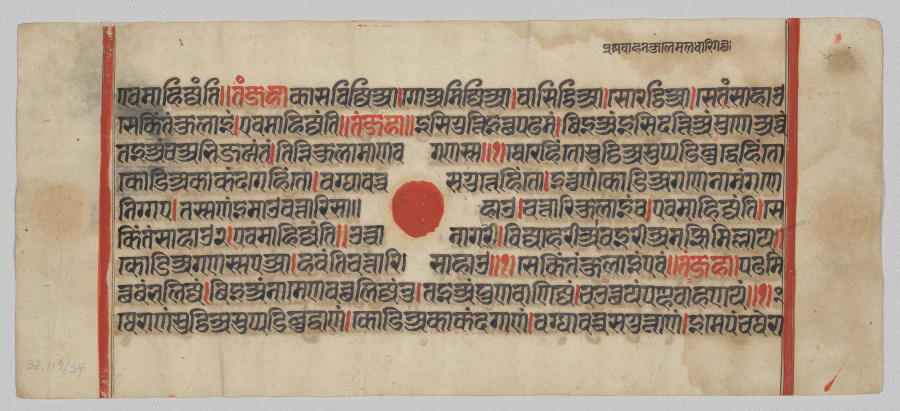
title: Text, Folio 63 (recto), from a Kalpa-sutra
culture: Western India, Gujarat, last quarter of the 15th century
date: c. 1475–1500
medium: Gum tempera, ink, and gold on paper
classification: Painting